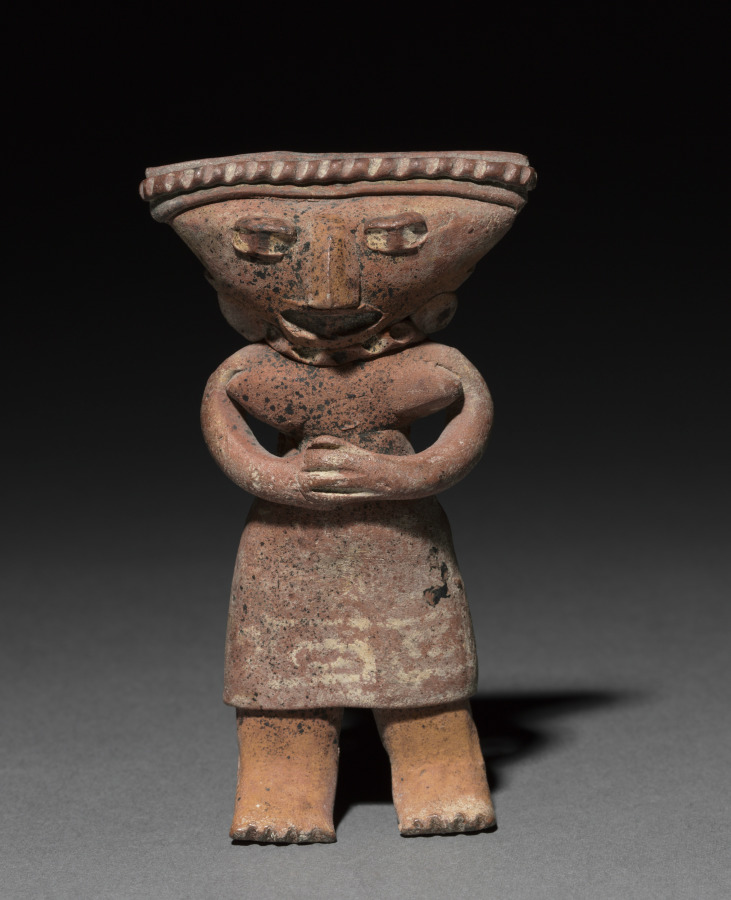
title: Standing Figurine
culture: Mesoamerica, West Mexico, Michoacán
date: 200 BCE–300 CE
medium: ceramic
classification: Ceramic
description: Clay figurines were the earliest and most common art form in Mexico and other countries in the ancient Mesoamerican (Middle American) culture region. Made first by hand and later with molds, most figurines belong to the traditions of commoners, such as farmers, rather than those of elites.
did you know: Clay figurines were the earliest and most common art form in the ancient Mesoamerican culture region.